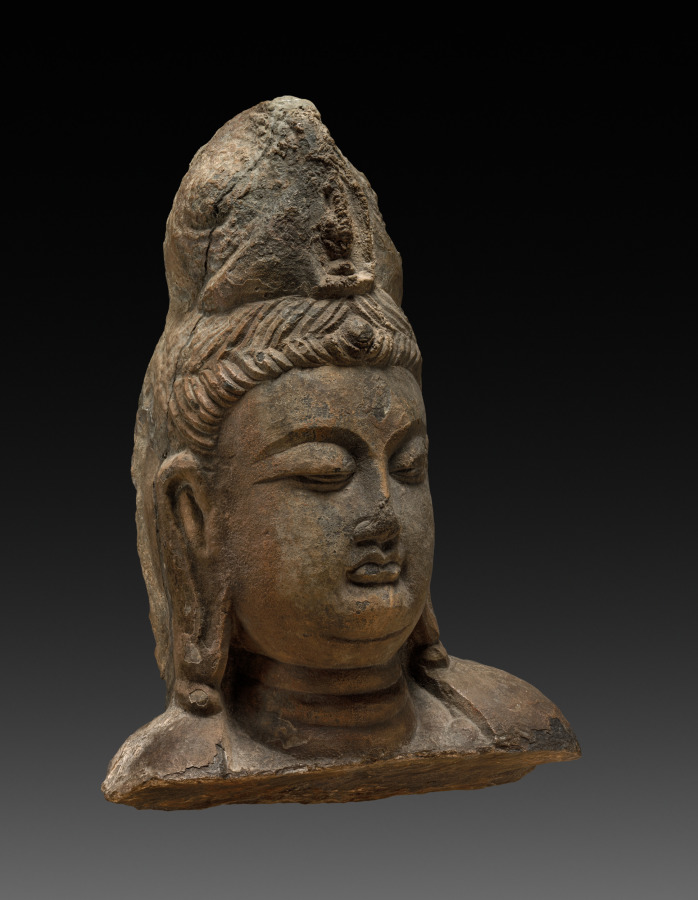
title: Head of Bodhisattva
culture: China, from Lung-mên, Tang dynasty (618-907)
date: 618–907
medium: dark gray limestone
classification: Sculpture